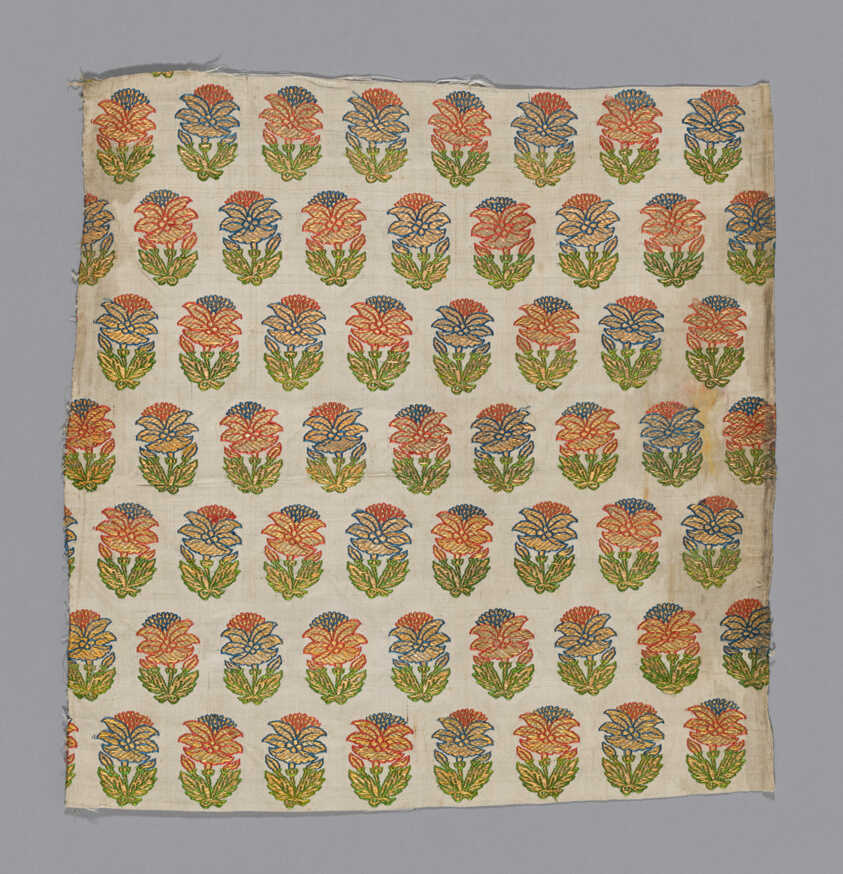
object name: Textile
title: Fragment (Dress Fabric)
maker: Iran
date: 19th century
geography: Iran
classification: textile; weaving